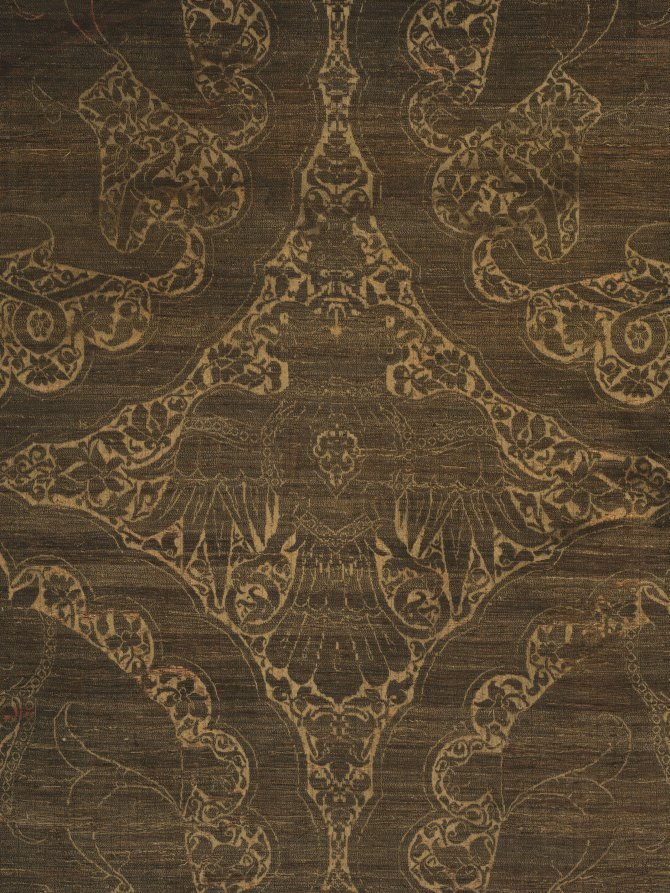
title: Cloth of gold with felines and eagles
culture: Northeast Iran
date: 1225–75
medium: Silk and gold thread: lampas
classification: Textile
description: Mongol taste for luxury was equated with gold, symbol of imperial authority, power, and legitimacy. This splendid cloth of gold-exceptionally large and luxurious-may have enriched the interior of a palace or a majestic tent. The golden pattern, although tarnished on the faded red silk ground, features scalloped medallions with felines whose long tails terminate in dragons’ heads amid elegant floral vines. Double-headed eagles form interstitial motifs on the floral ground. A radiant gold-on-gold band of pseudo-Arabic script enriches the top, woven with gold strips wrapped around a silk core on a ground of flat strips of gold, immediately beneath the pattern testing area.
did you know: Mongol cloths of gold, called nasji, incorporate Iranian, Central Asian, and Chinese features, reflecting the effects of gift exchanges and international commerce.